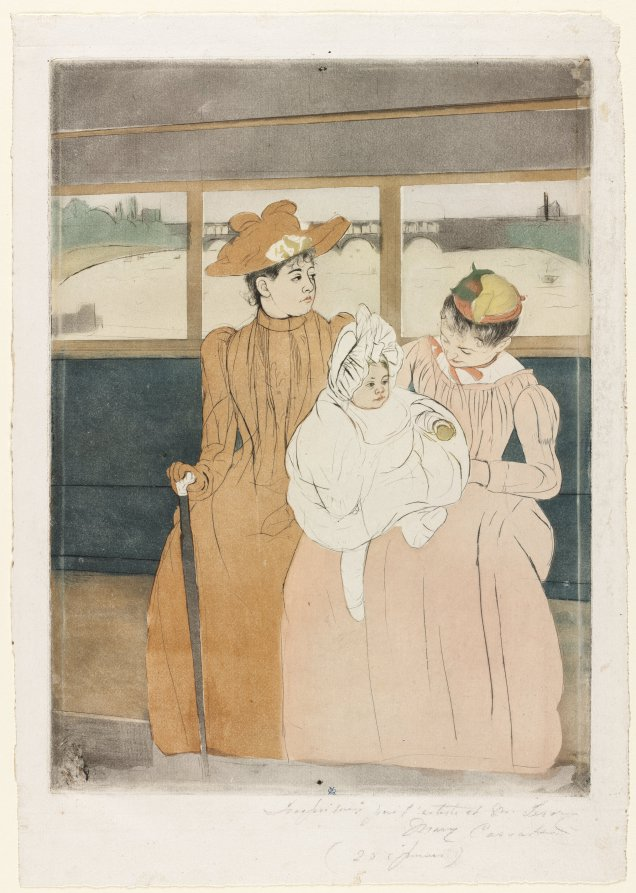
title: In the Omnibus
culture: France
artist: Mary Cassatt (American, 1844–1926)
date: 1890–91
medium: color drypoint and aquatint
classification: Print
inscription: inscribed, in pencil, at lower right below platemark: Imprimé par l'artiste et M. Leroy / Mary Cassatt / (25 épreuves); stamped at bottom center, in blue ink, on platemark: MC [Lugt 604]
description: This print belongs to a series of color etchings created by Mary Cassatt between 1890 and 1891. Each was influenced by the artist's study of Japanese woodblock prints, especially in their use of flat planes of color and domestic subject matter. In the scene depicted here, a middle-class woman accompanies her nursemaid and child on errands throughout Paris. The group rides in an omnibus, a form of public transportation where different genders and classes could intermingle. While the nanny's attention stays focused on her young charge, the female subject appears distracted, gazing toward the world beyond.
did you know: The artist Camille Pissarro described the series of prints to which this work belongs as "admirable, as beautiful as Japanese work," praising Cassatt's translation of Ukiyo-e woodblocks.